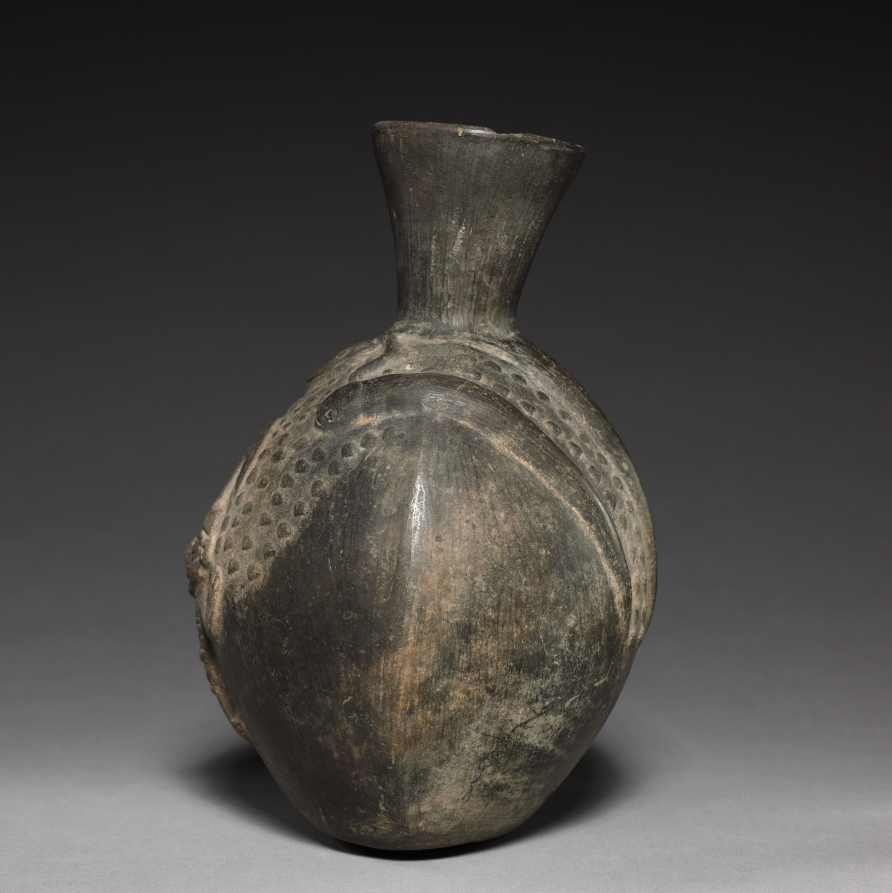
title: Bottle with Figure in Relief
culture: Peru, probably Chiclaya, Chimú, 13th-15th century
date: 1200s-1400s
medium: black ware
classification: Ceramic